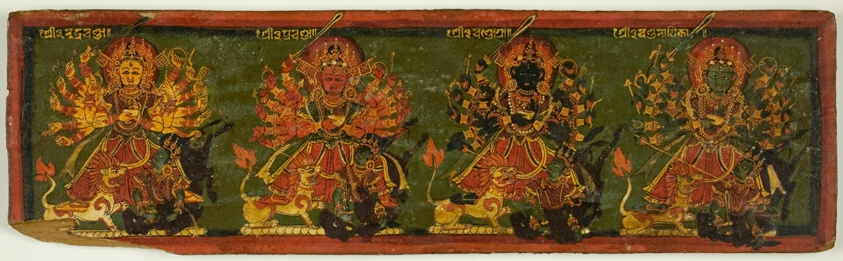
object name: Religious/Ritual Object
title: Manuscript Cover from the Glorification of the Great Goddess (Devimahatmya)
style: Himalayan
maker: Nepal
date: 18th century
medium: Pigments on wood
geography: Nepal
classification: manuscript; wood; ritual objects